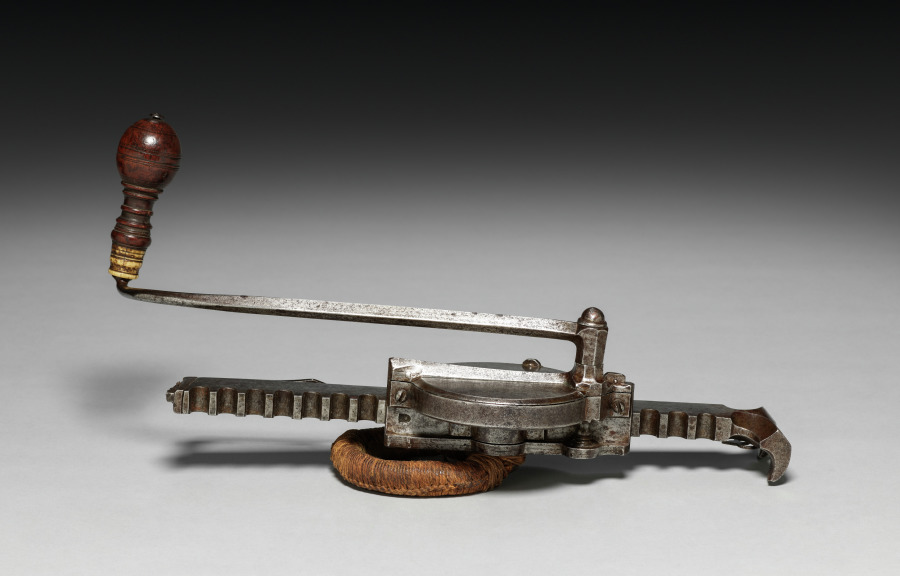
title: Cranequin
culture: Germany, Nuremberg (?), 16th century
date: c. 1580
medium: steel, flax cord, wooden handle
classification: Arms and Armor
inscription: gear case inscribed with later owner's name: CW Siball, 1665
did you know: The maker's mark says HW and may belong to Hans Wirsing, a craftsman from Nuremburg.